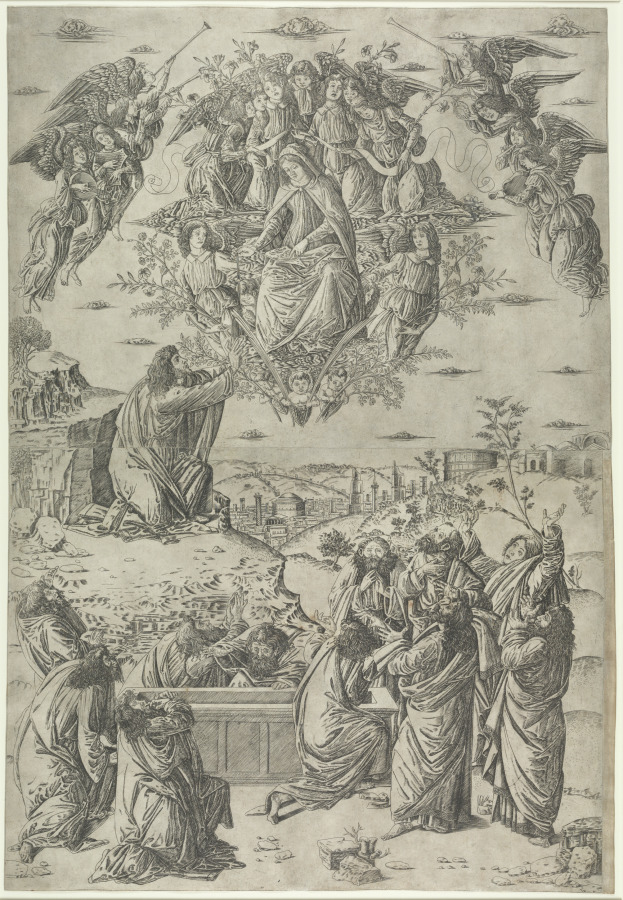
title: The Assumption of the Virgin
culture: Italy, Florence, 15th century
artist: Francesco Rosselli (Italian, 1448-about 1513)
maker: after Sandro Botticelli (Italian, 1444/45–1510)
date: c. 1495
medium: engraving printed on two sheets from two plates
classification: Print